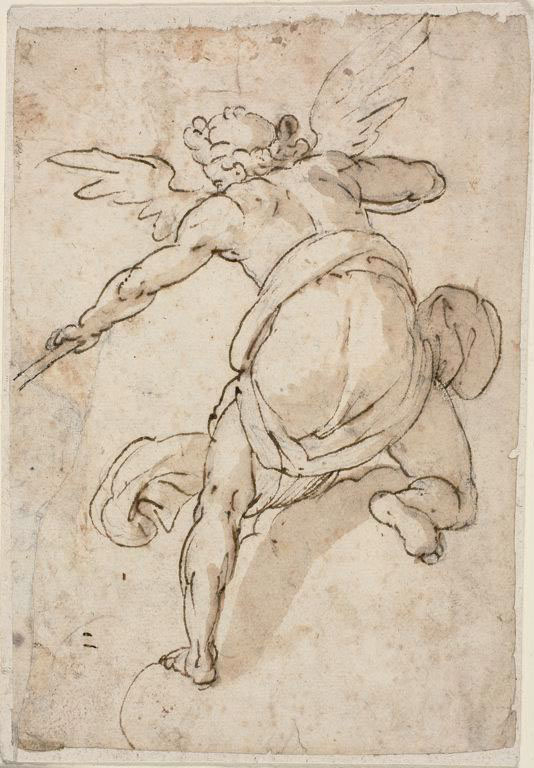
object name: Drawing and Watercolor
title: Angel Holding a Trumpet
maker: Federico Zuccaro (?); Italian, 1540/41-1609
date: 1576/79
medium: Pen and brown ink with brush and brown wash, with additions of graphite, on ivory laid paper, pieced and laid down on ivory laid paper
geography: Italy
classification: ink with wash; drawings (visual works); prints and drawing